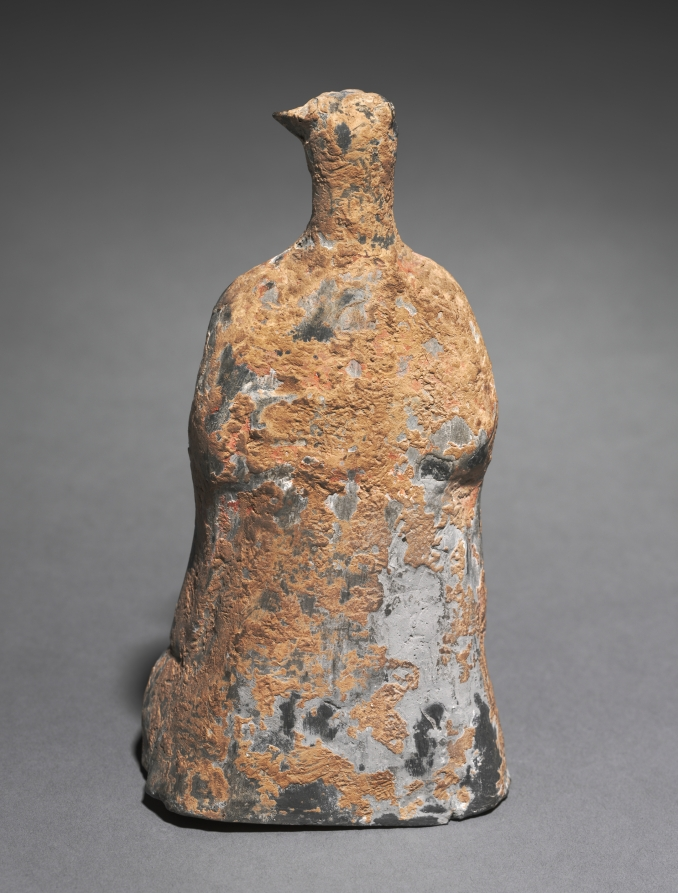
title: Mortuary Figure of the Zodiac Sign: Ox (Taurus)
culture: China, Northern Wei dynasty (386-534)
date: 500s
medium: gray earthenware with traces of slip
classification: Sculpture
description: The twelve-animal zodiac series—rat, ox, tiger, rabbit, dragon, snake, horse, goat, monkey, rooster, dog, and boar—signifies a traditional Chinese concept of time structured in a cyclical order. The twelve animals are also linked to the art of fortune-telling that underlies human existence in connection with the changes of the universe. The use of the twelve zodiac animals as tomb furniture suggests they provided a cosmological structure for the afterlife.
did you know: The lower half of the interior of the figure is hollow.